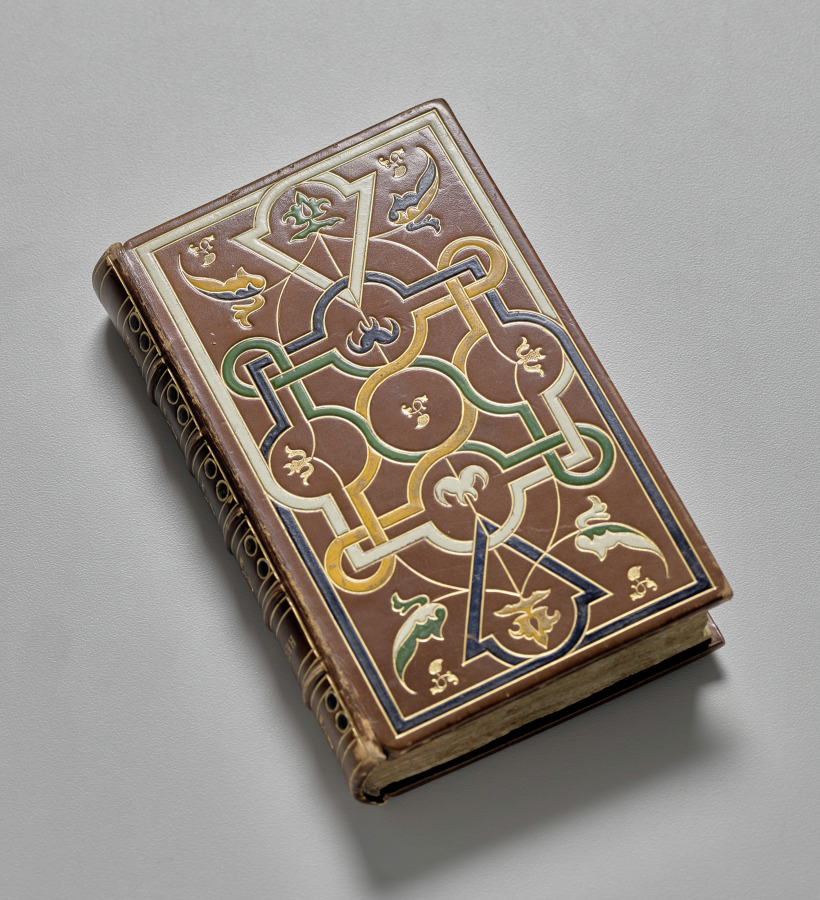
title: Printed Book of Hours (Use of Rome)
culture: France, Paris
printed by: Guillaume Le Rouge (French, Paris, active 1493–1517)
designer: Master of the Très Petites Heures of Anne of Brittany (French, Paris, active c.1480–1510)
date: 1510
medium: 112 printed folios on parchment, bound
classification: Bound Volume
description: Printed books of hours were produced between 1485 and 1520. Significantly less expensive than handwritten production, printing made the popularity of books of hours soar. More than 1,775 different versions were printed during this time, allowing much customization. This hybrid version has printed text but hand-colored images and comes from Paris, a major center of book production.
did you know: The workshop of Guillaume le Rouge was in the Neuve Notre-Dame near Paris’s Notre Dame Cathedral.